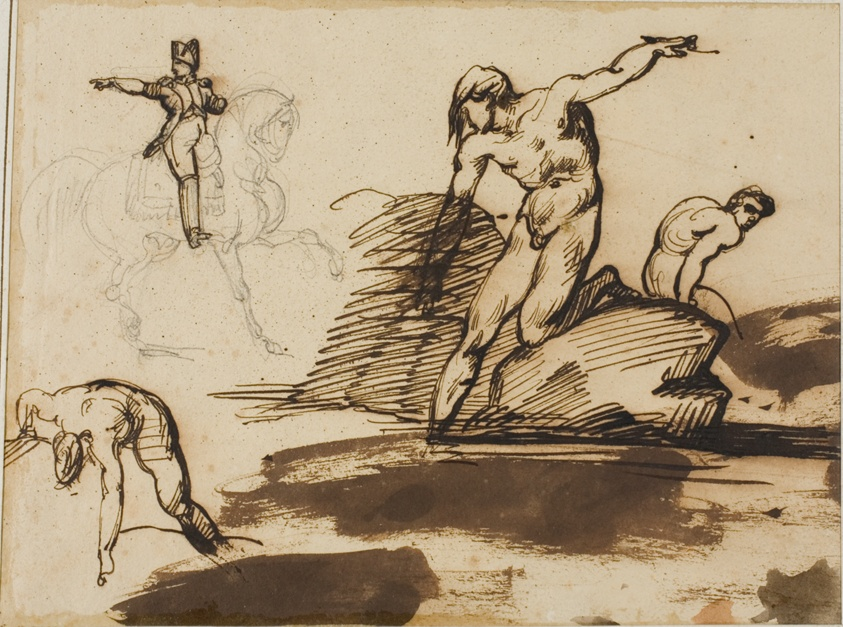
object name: Drawing and Watercolor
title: Study of Napoleon on Horseback with Sketches of Nudes Among Rocks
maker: Jean Louis André Théodore Géricault (French, 1791-1824)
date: 1813/14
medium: Pen and iron gall ink with brush and brown wash, over graphite, on cream wove paper, perimeter mounted on ivory laid paper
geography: France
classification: pen and ink drawings; drawings (visual works); prints and drawing